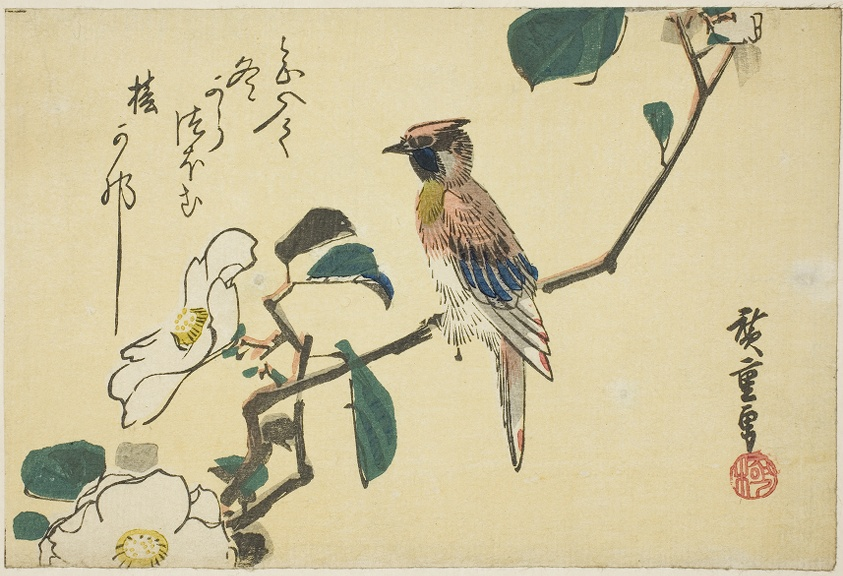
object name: Print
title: Black-naped oriole on camellia branch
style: Japanese (culture or style)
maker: Utagawa Hiroshige 歌川 広重; Japanese, 1797-1858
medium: Color woodblock print; yotsugiriban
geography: Japan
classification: woodblock print; print; asian art